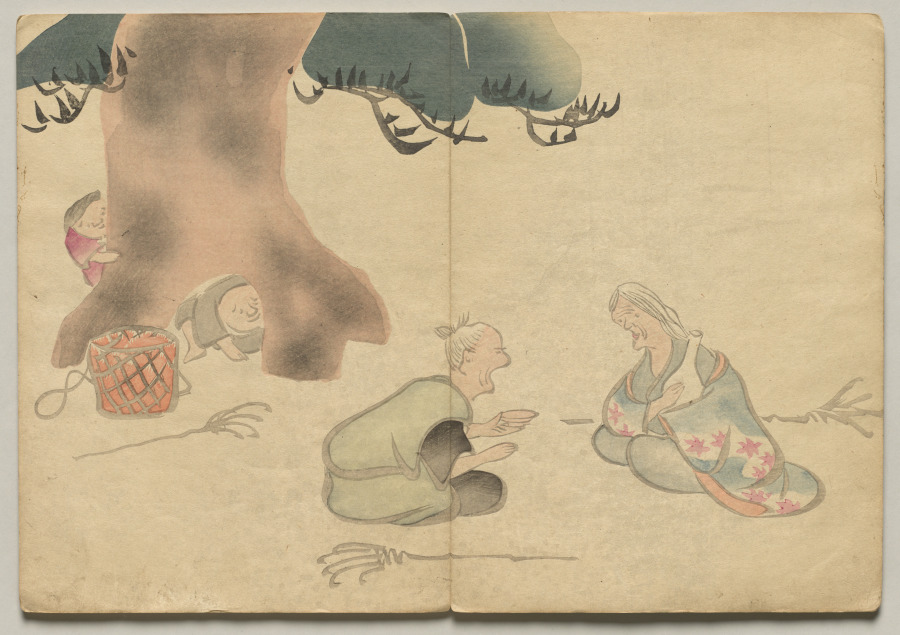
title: Scene from The Kōrin Picture Book (Volume 1)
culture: Japan, Edo period (1615–1868)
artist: Nakamura Hōchū (Japanese, d. 1819)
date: 1800s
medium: color woodblock printed book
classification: Bound Volume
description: Ogata Korin (1658-1716) was one of the most admired artists of Rimpa, or "decorative school painting." These books by the charming later-generation Rimpa artist Hochu record Korin's inventive designs.